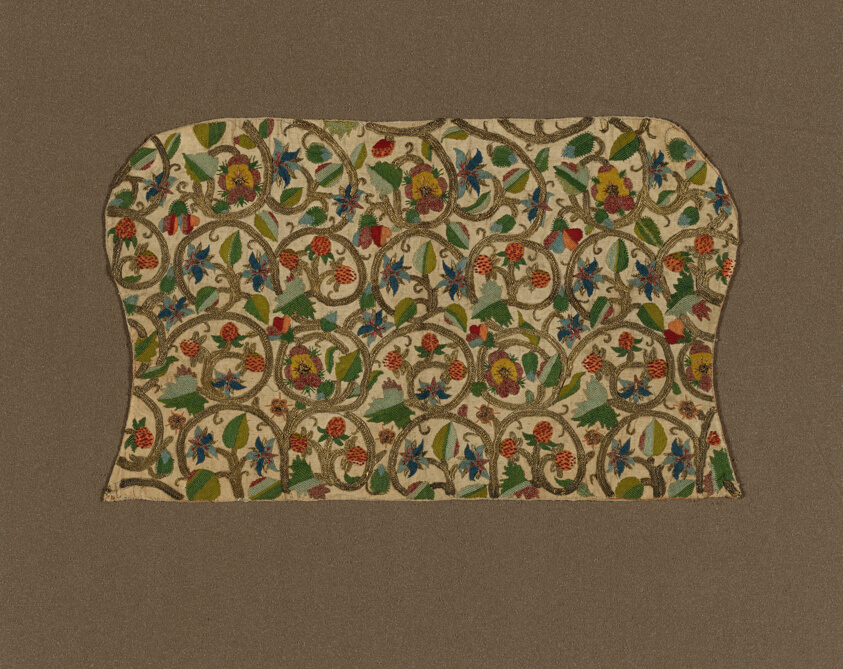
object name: Costume and Accessories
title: Woman's Coif (Altered)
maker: England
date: c. 1600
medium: Linen, plain weave; embroidered with silk and gilt-metal-strip-wrapped silk in back, individual back, bullion, chain, plaited braid, and stem stitches; buttonholed couching, darned wheels and French knots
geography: England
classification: textile; coif; cap (headgear); needlework (visual works); costume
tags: fashion, yellow (color), white (color), vines, pink (color), green (color), gold (color), foliage, flowers, blue (color), strawberries